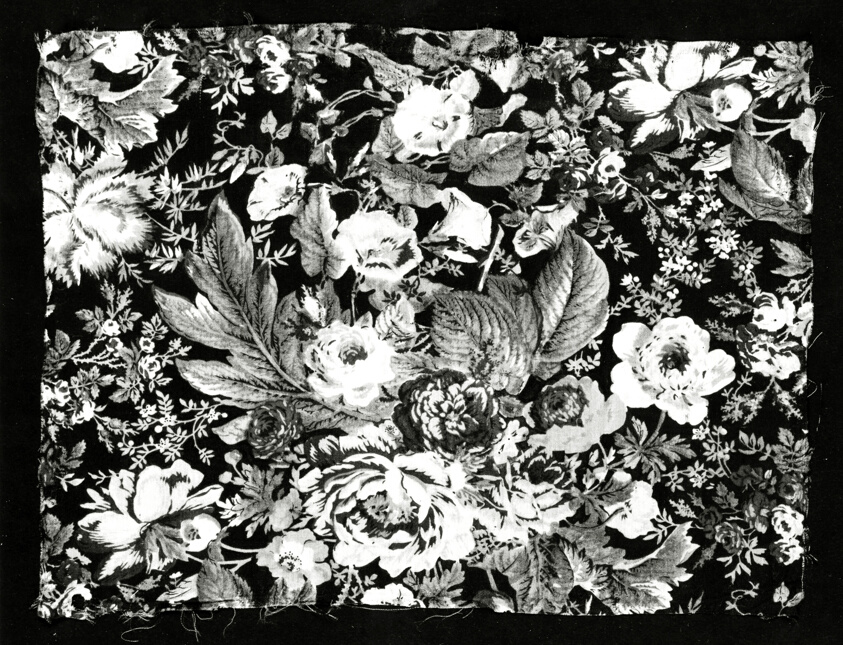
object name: Textile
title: Fragment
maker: England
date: 1875/1900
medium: Wool, twill weave; roller printed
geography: England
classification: textile; weaving - printed